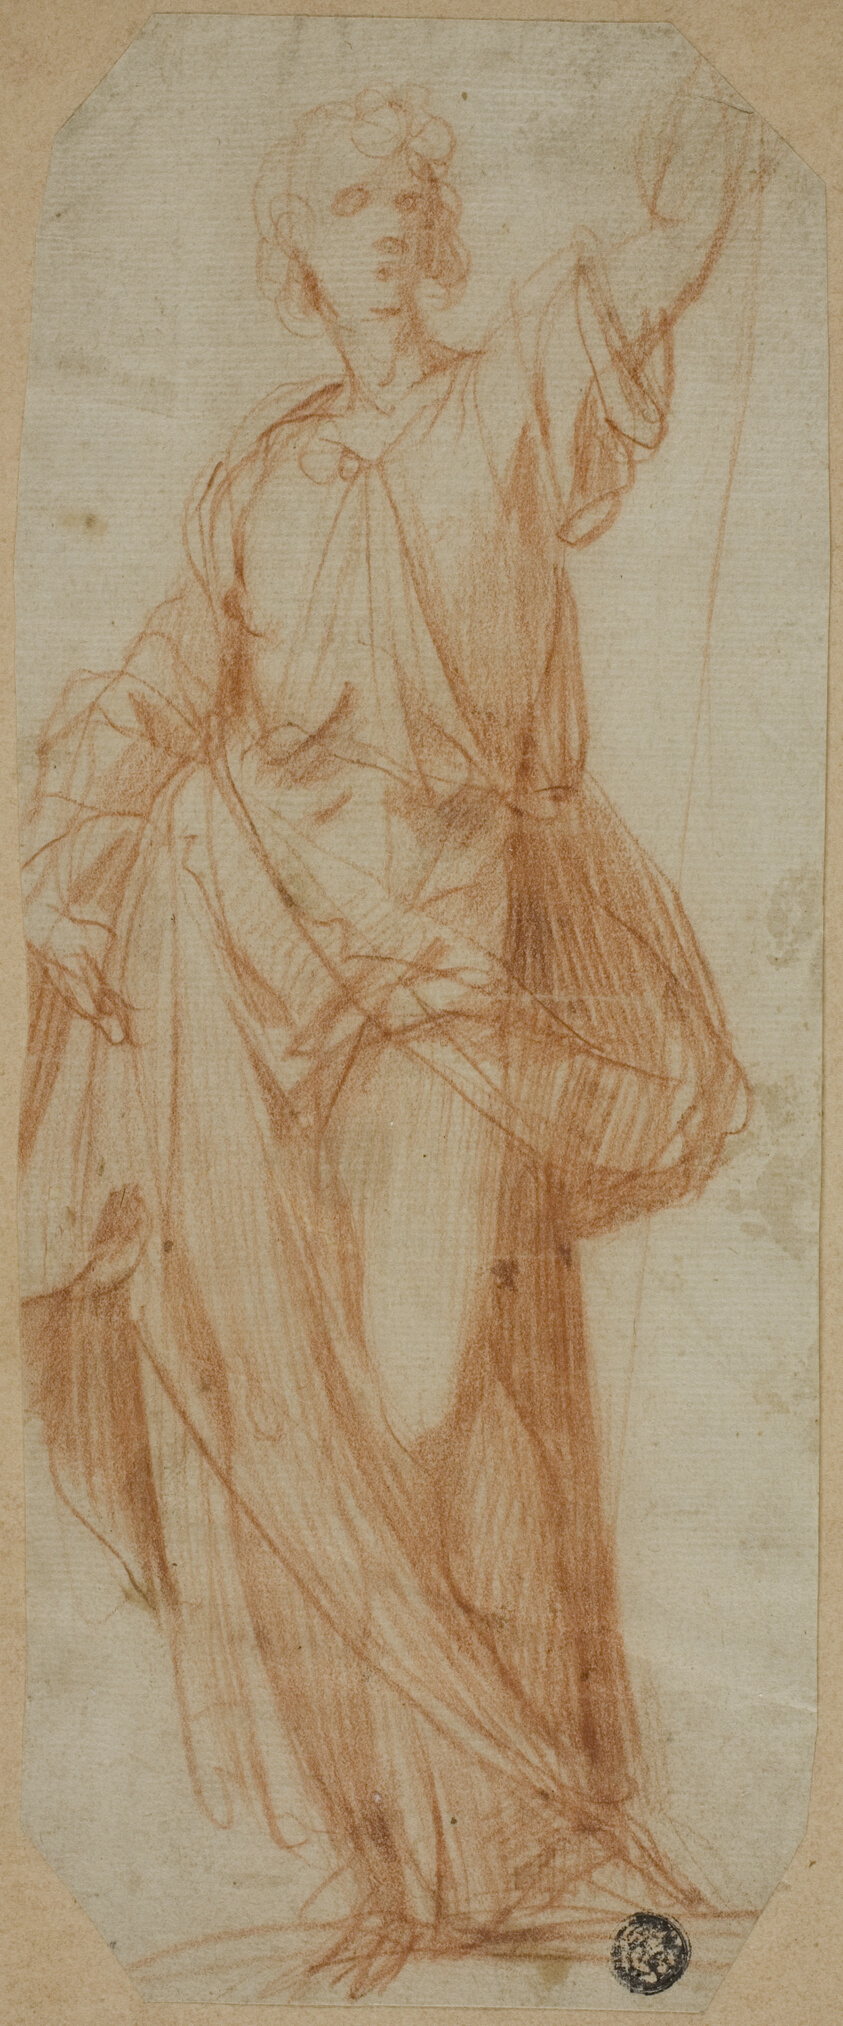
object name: Drawing and Watercolor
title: Standing Draped Figure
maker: Giuseppe Cesari, called Il Cavalier d'Arpino; Italian, 1568-1640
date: 1589/90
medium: Red chalk on ivory laid paper, tipped onto cream laid paper, prepared with salmon wash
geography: Italy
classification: chalk; drawings (visual works); prints and drawing